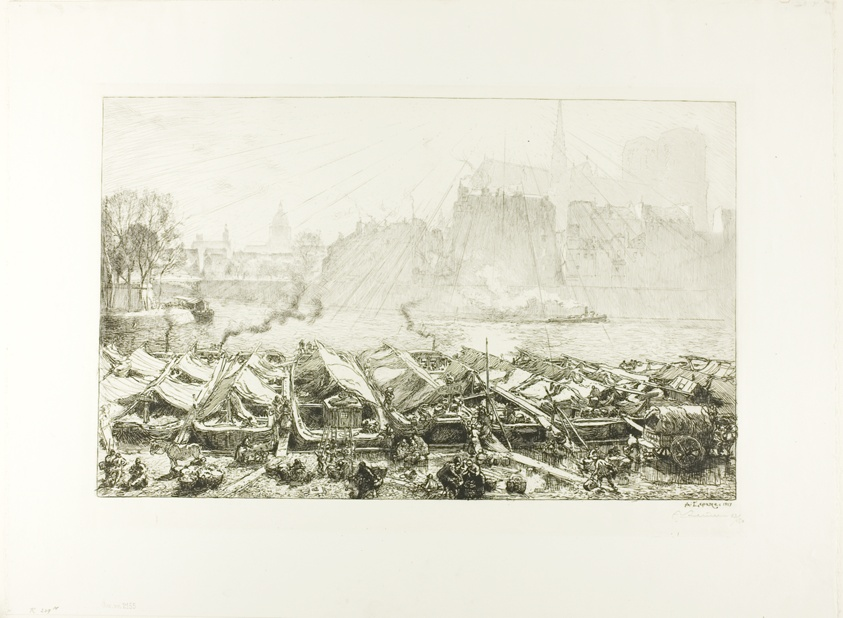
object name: Print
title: The Large Apple Market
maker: Louis Auguste Lepère (French, 1849-1918)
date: 1891, printed 1917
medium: Etching on cream wove paper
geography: France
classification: etching; print; prints and drawing